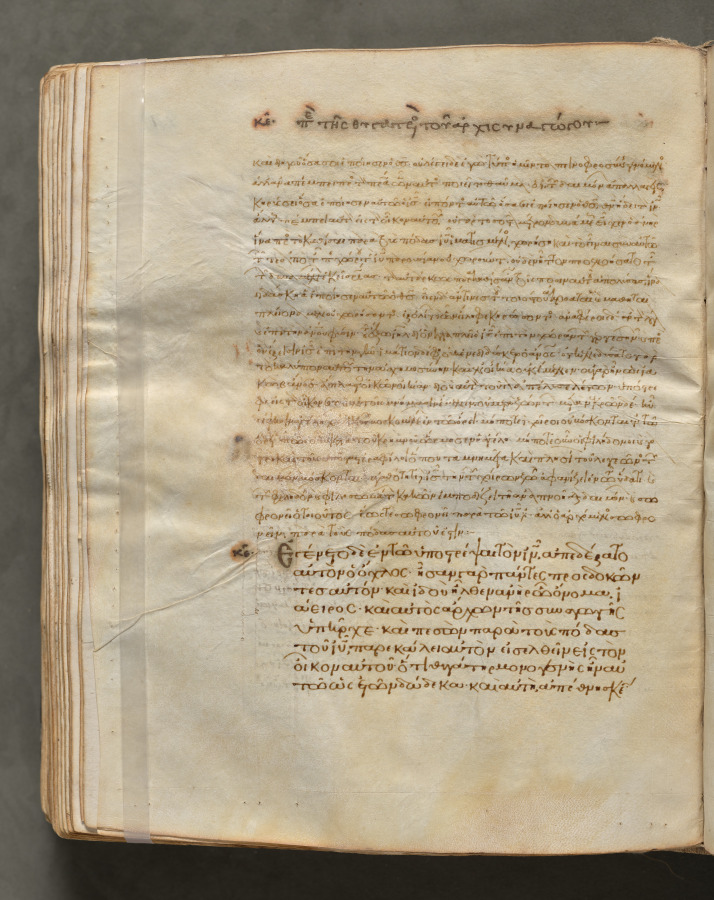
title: Text, folio 242 (verso), from a Gospel Book with Commentaries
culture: Byzantium, Constantinople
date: c. 1000–1100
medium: ink, tempera, and gold on vellum; leather binding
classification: Bound Volume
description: Each of the four gospels in this book opens on a page with brilliantly illuminated borders depicting the author of the text as well as birds—principally peacocks, symbols of the immortality of the soul—and fountains, representing the fountain of life and the salvation of the soul. This volume consists of 428 leaves with texts in Greek. Its level of sophistication suggests that it was probably written and decorated in a monastery in Constantinople.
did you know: Gospel books were carried in procession through Byzantine churches.